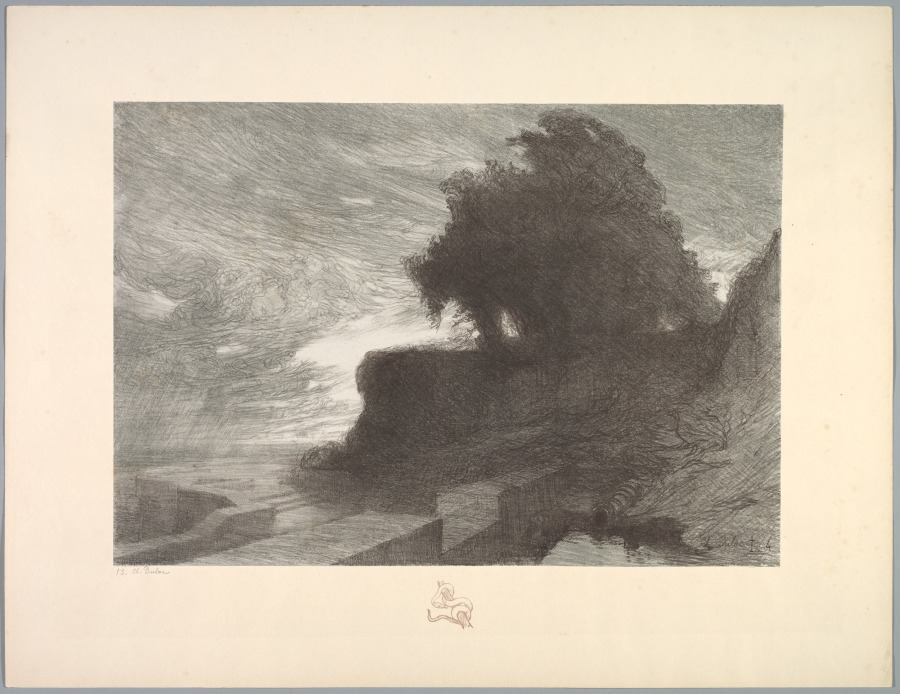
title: Suite de Paysages: Landscape, Plate 4, Remarque, Snake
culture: France, 19th century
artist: Charles Marie Dulac (French, 1865–1898)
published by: Printer: Lemercier, Imprimeur Lemercier (per colophon)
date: 1892–93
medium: color lithograph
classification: Print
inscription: Below image, left, in graphite: 15. Ch. Dulac;Verso, in graphite: K-00639-004 In plate: lower right corner: Ch. Dulac t. 4